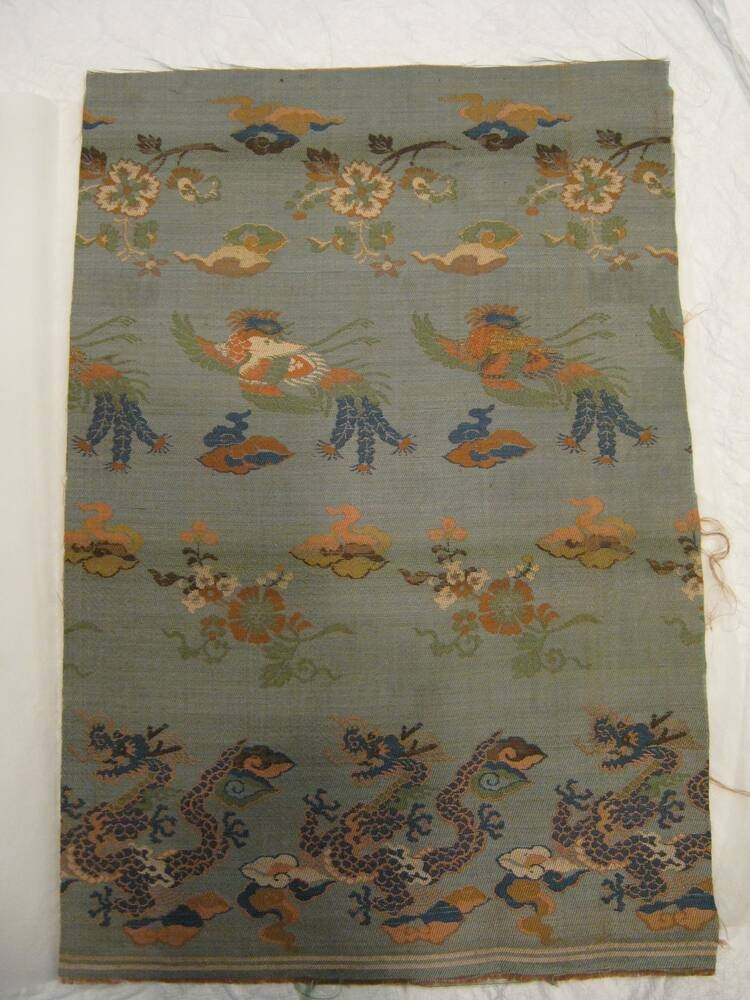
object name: Textile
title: Fragment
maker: Japan (copy of a Chinese design)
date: Meiji period (1868–1912), 1875/1900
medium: Brocaded plain compound twill, silk, gilt and silvered paper wound on silk? core.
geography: Japan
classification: textile; weaving